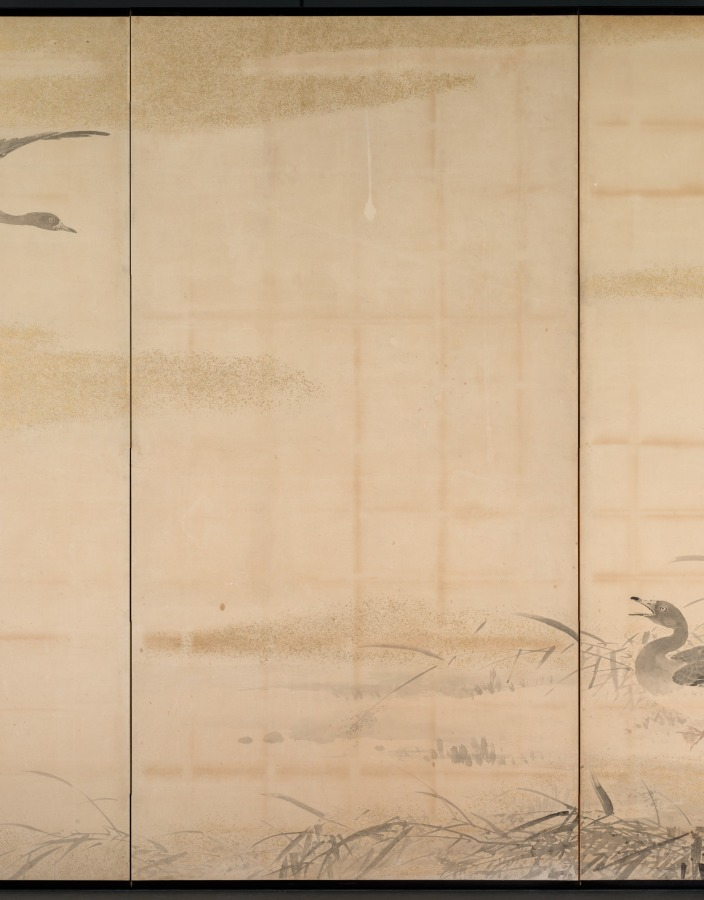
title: Geese, Reeds, and Water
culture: Japan, Edo period (1615–1868)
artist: Yamamoto Baiitsu (Japanese, 1783–1856)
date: 1800s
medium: One of a pair of four-panel folding screens; ink, color, and cut gold foil on paper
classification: Painting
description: This byōbu composition differs from most in that it comprises two four-panel screens, rather than two six-panel units. Since the current mounting is modern, it is impossible to determine whether its present configuration represents its original design. Some panels may have been removed to help the screens better fit into a modern interior space. Baiitsu worked almost exclusively in monochromatic ink tones and favored classical Chinese painting themes.